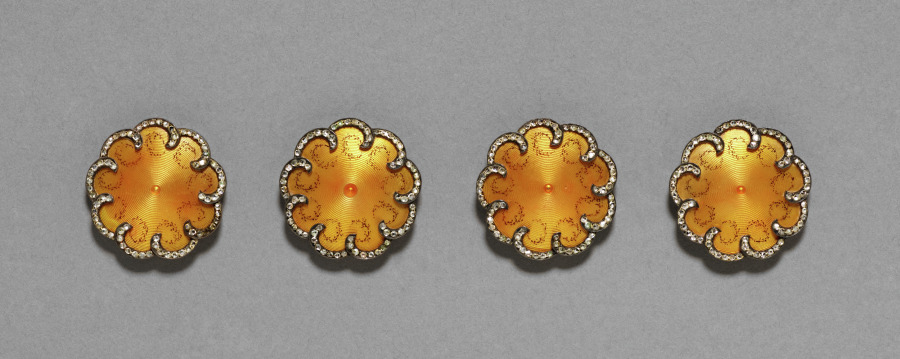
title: Buttons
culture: Russia, St. Petersburg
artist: firm of Peter Carl Fabergé (Russian, 1846–1920)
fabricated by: August Wilhelm Holmström (Russian, 1929–1903)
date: after 1896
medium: gold, enamel, diamonds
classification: Miscellaneous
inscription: inscribed: double-headed eagle; Fabergé; St. Petersburg, Moscow (all in Cyrillic; inside lid of box).